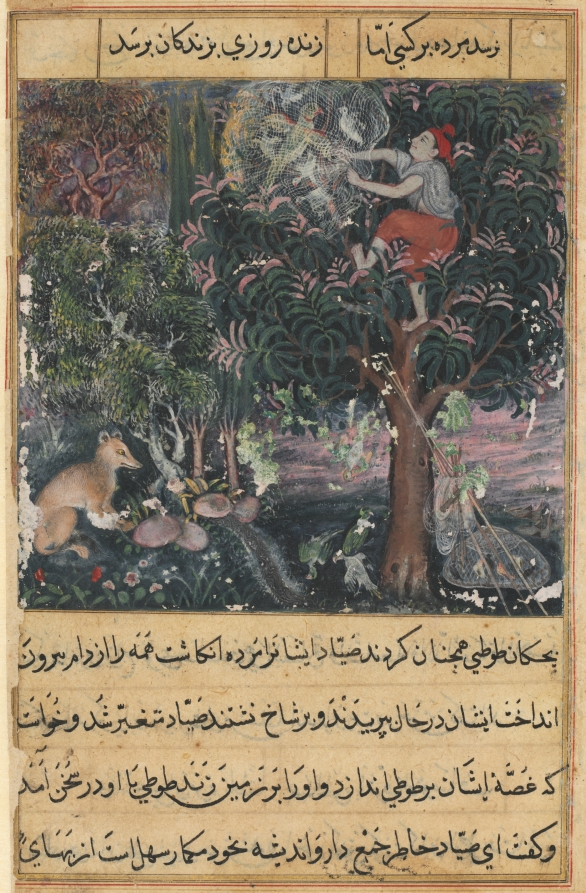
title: The hunter throws away the baby parrots, who pretend to be dead, and captures the mother, from a Tuti-nama (Tales of a Parrot): Fifth Night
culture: Mughal India, court of Akbar (reigned 1556–1605)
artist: attributed to Basavana (Indian, active c. 1560–1600)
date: c. 1560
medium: gum tempera, ink, and gold on paper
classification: Painting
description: Despite the chess-playing monkey’s grim end, the baby parrots continued to cavort with the fox cubs. One day the mother fox discovered that her cubs had been eaten by a panther. Blaming the parrots, she lured a hunter to their tree. The hunter climbed the tree and ensnared the mother parrot and her babies. The mother instructed her young to play dead, then pleaded with the hunter to take her alone, saying that since she knew the art of healing she would fetch a high price. Lush vegetation and a stream of water painted with a soft brush indicate a fresh new stylistic vision that represents a departure from Indian and Persian styles that came before.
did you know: The pink leaves are new shoots that have not yet turned green.